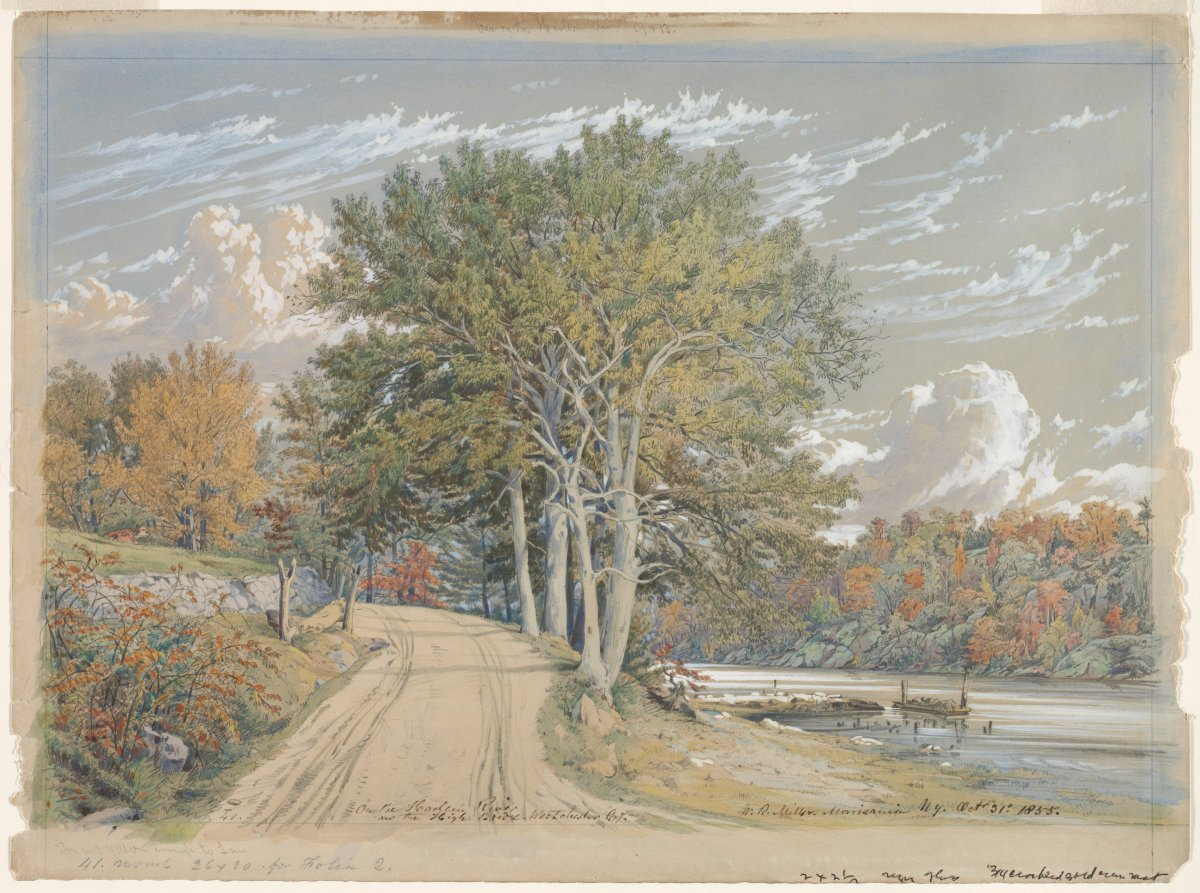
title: On the Harlem River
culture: America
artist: William Rickarby Miller (American, 1818–1893)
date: 1855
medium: watercolor with gouache, over graphite, framing lines in graphite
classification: Drawing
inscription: signed, lower right, in brown ink: W. R. Miller. Morrisania N Y. Octr 31t. 1855.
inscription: in brown ink, lower center: On the Harlem River / nr the High Bridge. Westchester CoY.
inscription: in graphite in lower left above framing line: 41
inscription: in graphite, mount 26 x 20 for Folio 2.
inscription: upper center: View on the Harlem River. 19 x 13.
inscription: in graphite, lower left: Tree not Yellow enough to [Sun?]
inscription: in black ballpoint pen, lower right: 2 x 2_ [regu?] glass '_ cracked Gold [cream?] mat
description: When William Rickarby Miller arrived in America from England in 1845, he found watercolor painting in a dismal state—“a branch of Painting scarcely at all cultivated here.” Nonetheless, Miller made his living producing watercolors for print publications, depicting picturesque American woodlands with the staid British technique of his training. In On the Harlem River, Miller overlays delicate graphite line work with tints of luminous watercolor and dense gouache, capturing the color and light effects of a crisp autumn day. His meticulous transcription of individual leaves, branches, and stones displays his technical finesse, as well as his interest in documenting the particularities of nature. He shared this preoccupation with the Hudson River School, a mid-century American landscape painting movement whose members used detailed, on-site drawings of natural subjects as aids in making oil paintings. Miller’s great innovation was to marry the Hudson River manner to the medium of watercolor, anticipating the landscapes of American watercolorists in the decades to follow.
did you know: The tall trees at the center of Miller’s composition appear to be American sycamores, deciduous trees with creamy bark and spiky round fruit that grow in moist soil near streams and riverbanks.